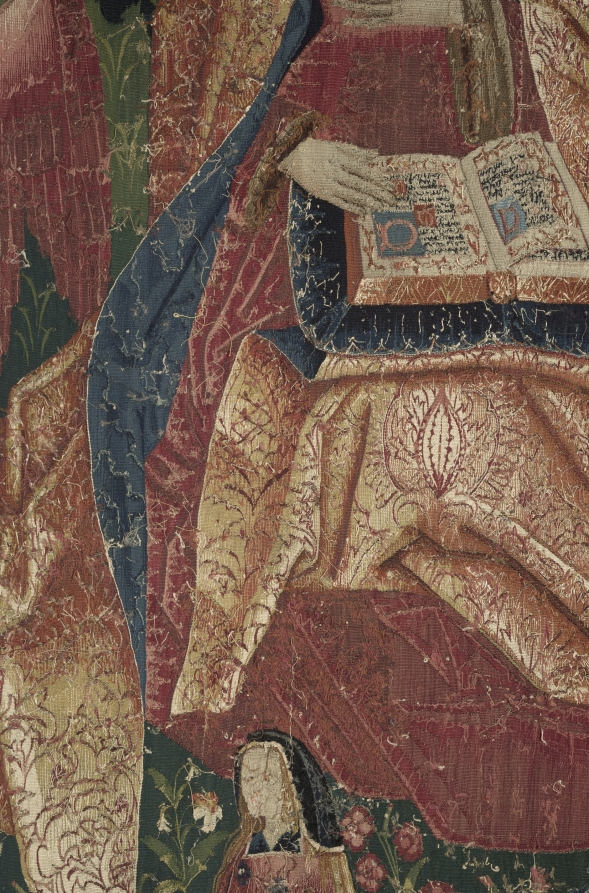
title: The Triumph of Eternity (from Chateau de Chaumont set)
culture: France, Lyon(?), early 16th century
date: 1512–15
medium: silk and wool; tapestry weave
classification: Tapestry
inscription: French verse in Gothic letters translates as follows: "Nothing triumphs by right authority, Unless it be conducted by Eternity. Nothing is permanent beneath the firmament, But above us triumphs Eternity."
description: The Triumph of Eternity is represented by the Coronation of the Virgin. Dressed in crimson velvet with an opulent brocaded velvet shawl, the Virgin is seated in the center as two angels hold a crown over her head. Five musical angels surround her playing an organ, recorder, straight cornetto, harp, and lute, while another sings from an open music book. The scenes in the set display a conservative style in which the figures are placed in shallow landscapes, thereby ignoring pictorial innovations for depicting space and mass. The verse in Old French at the top states: Nothing triumphing by due authority Remains permanent and durable. Nothing is permanent under the heavens, But above, eternity triumphs.